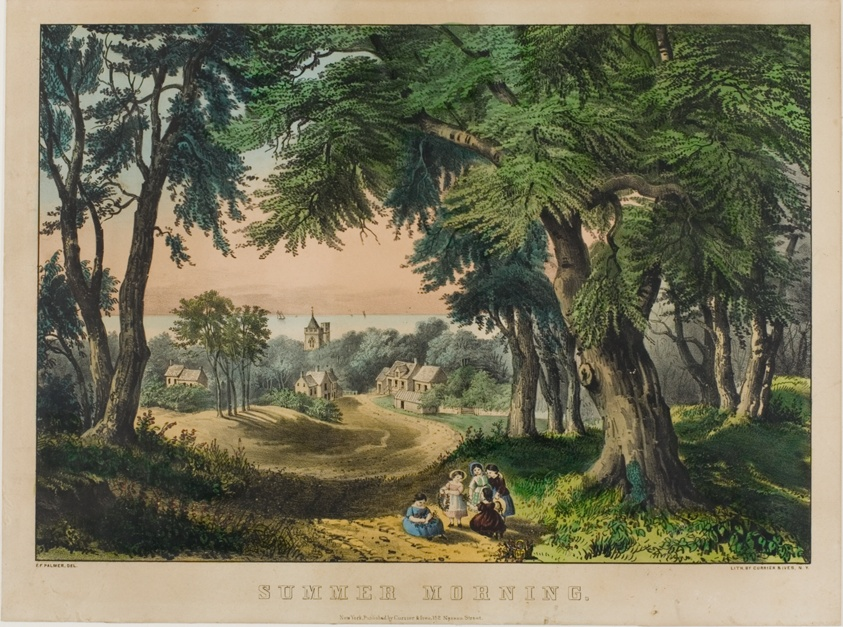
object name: Print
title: Summer Morning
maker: Frances Palmer (American, born England, 1812–1876); published by Currier & Ives (American, 1824–1895)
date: 1862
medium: Color lithograph, heightened by gum arabic, on thick buff wove paper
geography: United States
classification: lithograph; print; prints and drawing